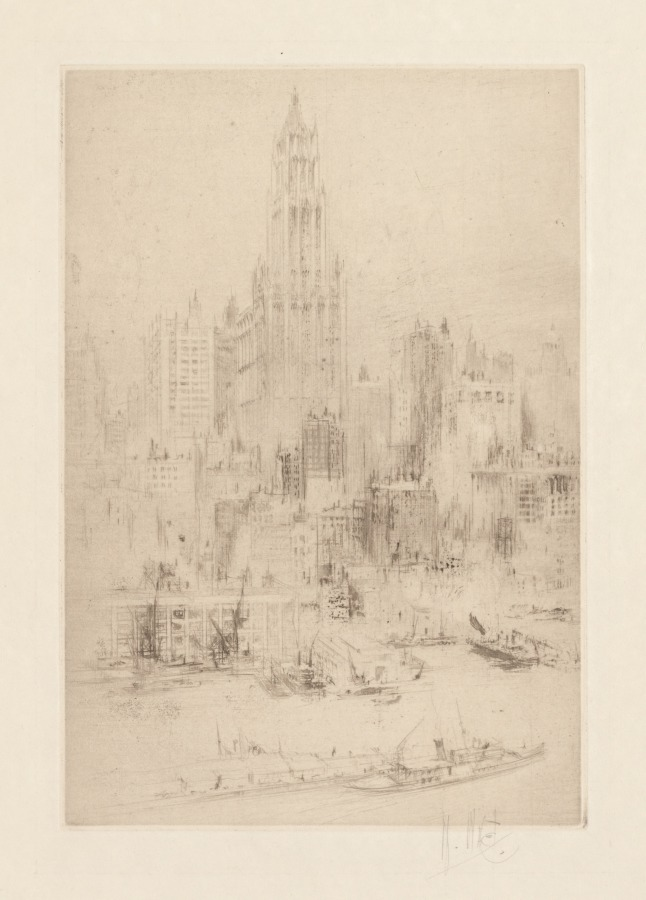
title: Downtown Manhattan from the East River, with the Woolworth Building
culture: Britain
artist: William Walcot (British, 1874–1943)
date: 1924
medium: etching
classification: Print